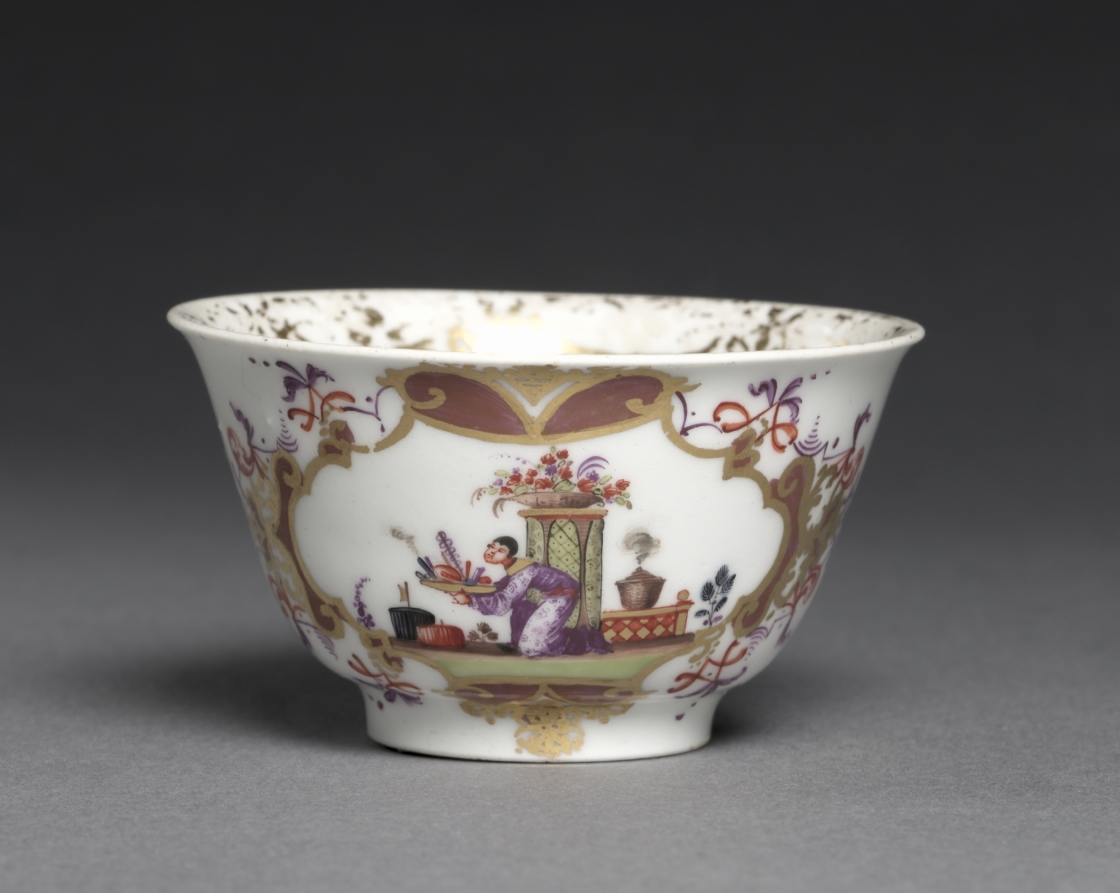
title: Cup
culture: Germany, Meissen, 18th century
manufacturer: Meissen Porcelain Factory (German, est. c. 1710)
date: c. 1725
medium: porcelain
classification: Ceramic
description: About 1725, Herold introduced a new variant of his "chinoiserie" decoration, in which small, full-length figures were depicted against cloudless skies, represented by the now brilliantly white porcelain, within foliate borders of gilt and enamel. This configuration became the standard formula for Meissen figural decoration for the next twenty years, although European subjects came to be depicted with greater frequency toward the middle of the century.